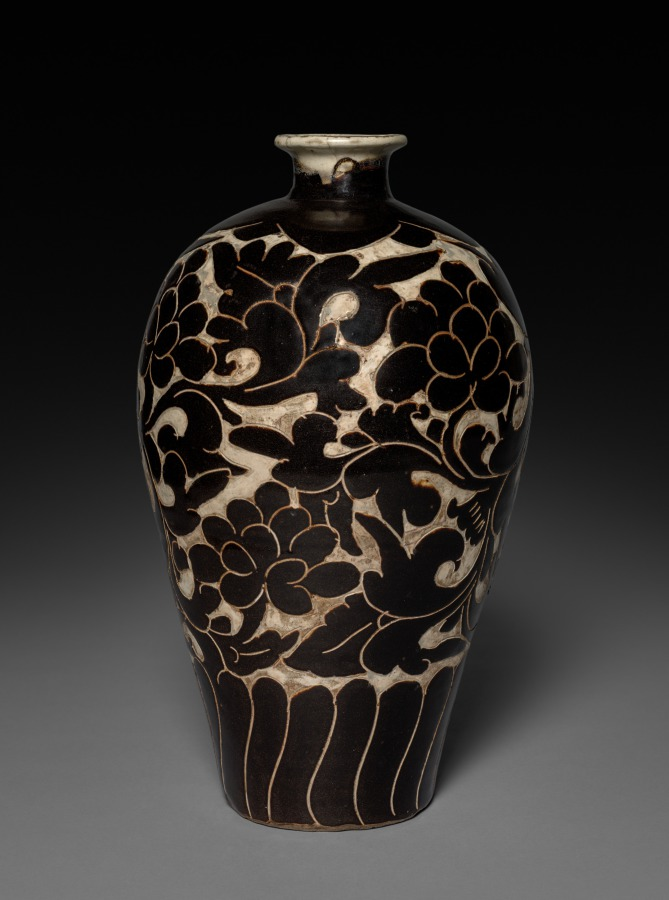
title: Vase with Peony Decoration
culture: China, Northern Song dynasty (960-1127)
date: 1000s-1100s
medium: Gray stoneware with underglaze slip decoration, Cizhou ware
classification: Ceramic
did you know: The thick foot rim is unglazed, while the shallow recessed flat base is covered with white slip and chance accumulations of underglaze pigment.